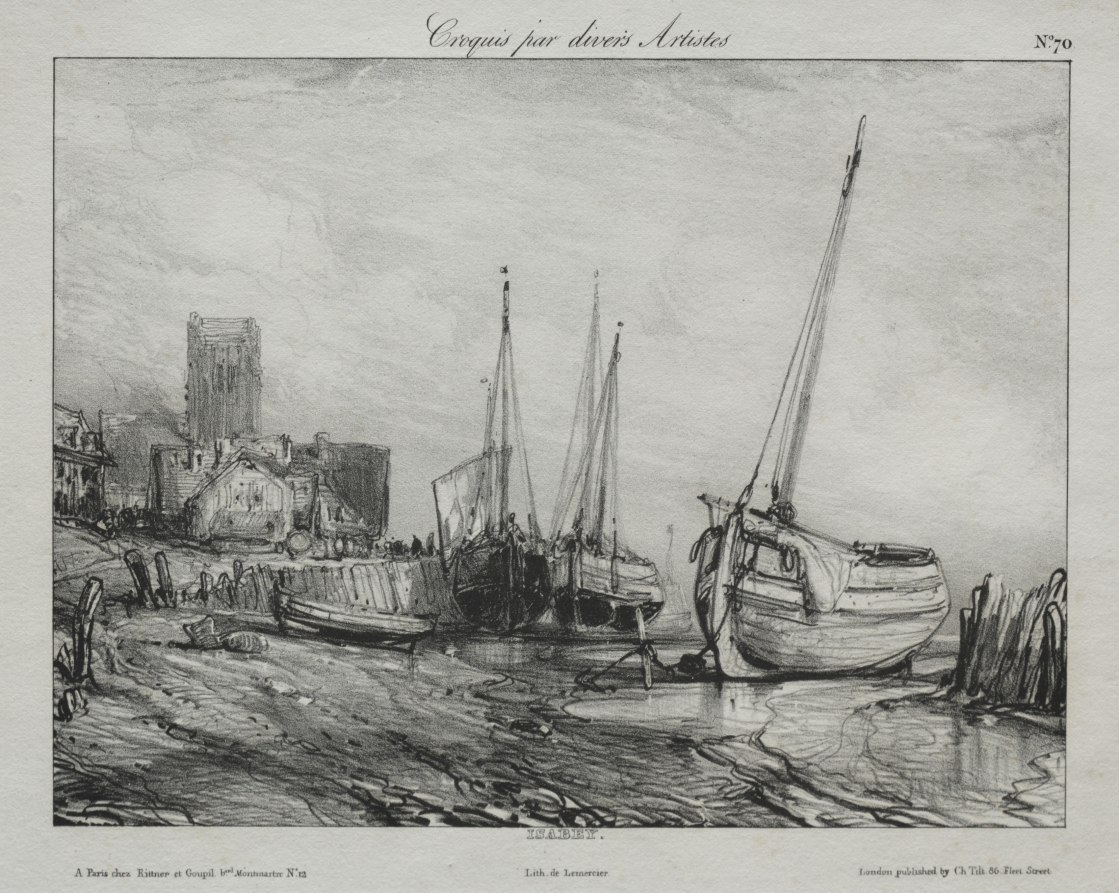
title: Fishing Boats along the Beach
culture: France, 19th century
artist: Eugène Isabey (French, 1803–1886)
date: c. 1830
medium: lithograph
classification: Print